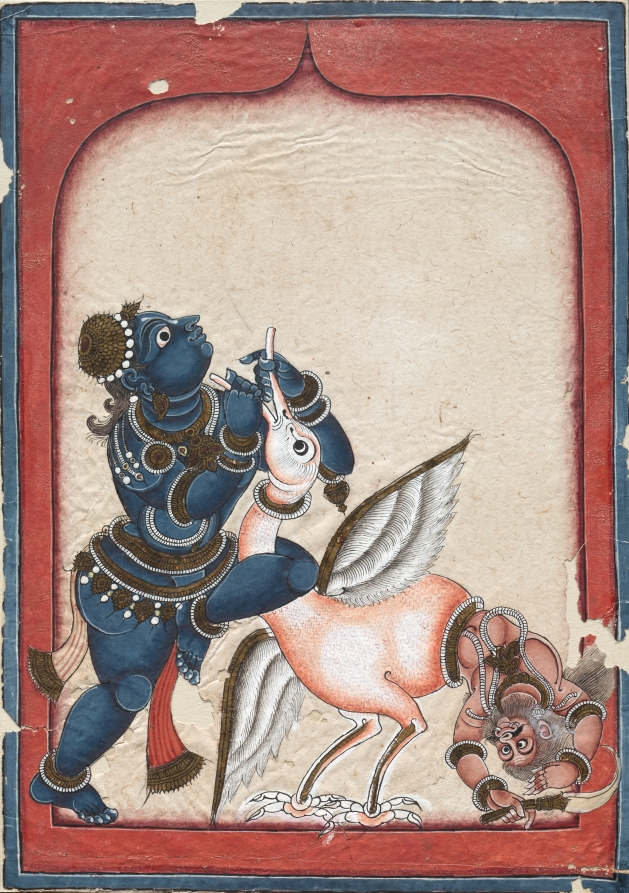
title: Krishna Vanquishing the Crane-Demon Bakasura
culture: Southern India, Andhra Pradesh, Tirupati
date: late 1700s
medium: gum tempera and gold on paper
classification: Painting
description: The Hindu god Vishnu incarnated himself as Krishna in response to pleadings from the Earth goddess to rid her of a wicked king. The king sent demons of many forms to assassinate Krishna, who effortlessly destroyed them. The South Indian artist effectively used a diagonal composition to show the cause and effect of Krishna’s assault and the fall of the defeated demon.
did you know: The true form of the crane-demon tumbles out from the backside of the distressed bird.